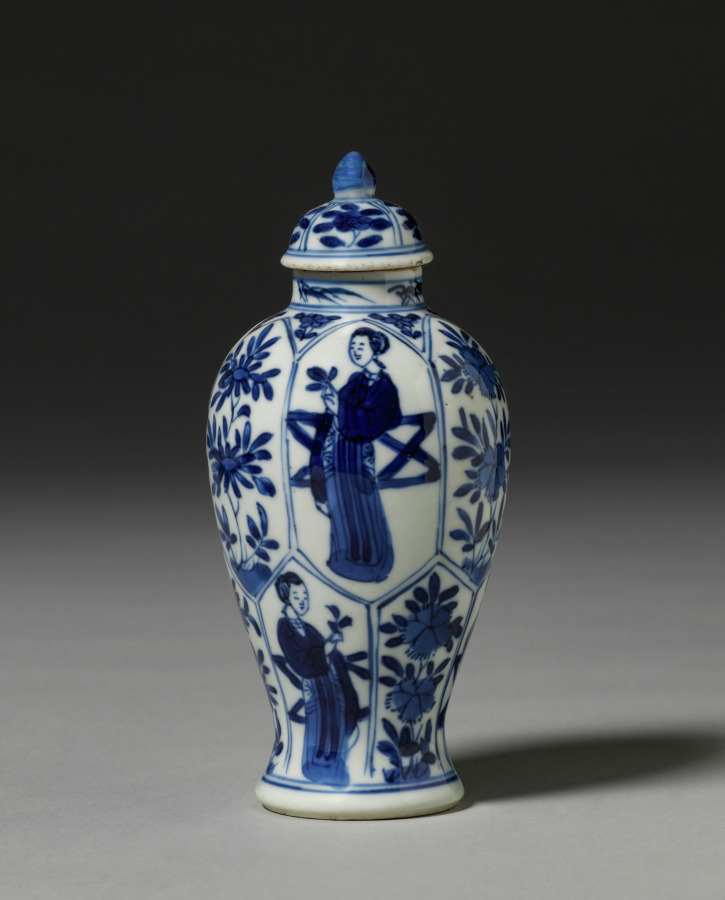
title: Jar with Cover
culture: China, Qing dynasty (1644-1911)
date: 19th Century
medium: porcelain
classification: Ceramic